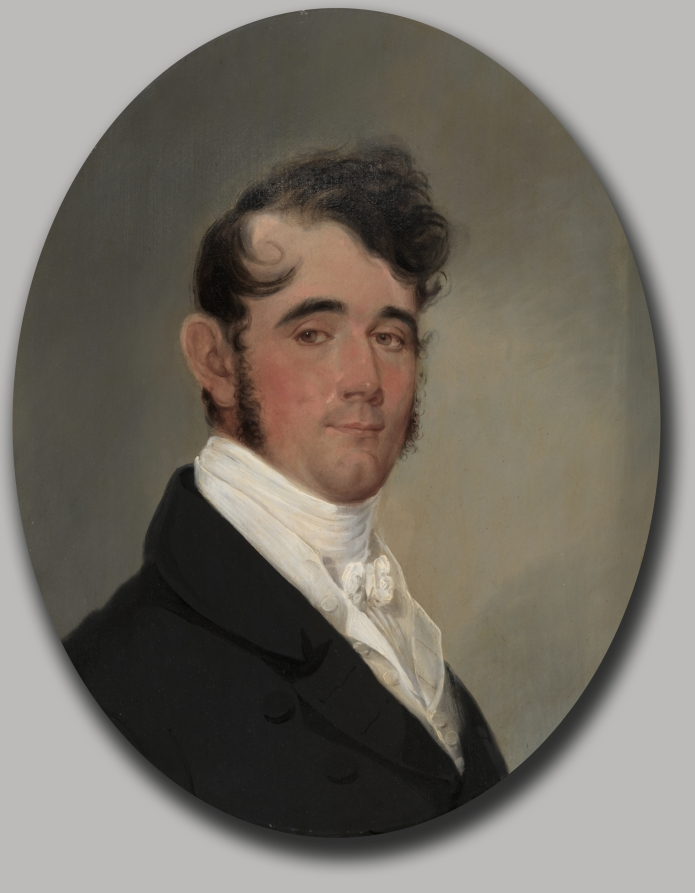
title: Benjamin Rouse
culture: America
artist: attributed to John Wesley Jarvis (American, born England, 1781–1840)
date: 1819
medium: oil on canvas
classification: Painting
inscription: Inscribed on back: "My portrait was painted Nov 1819 when I was 24 years old."